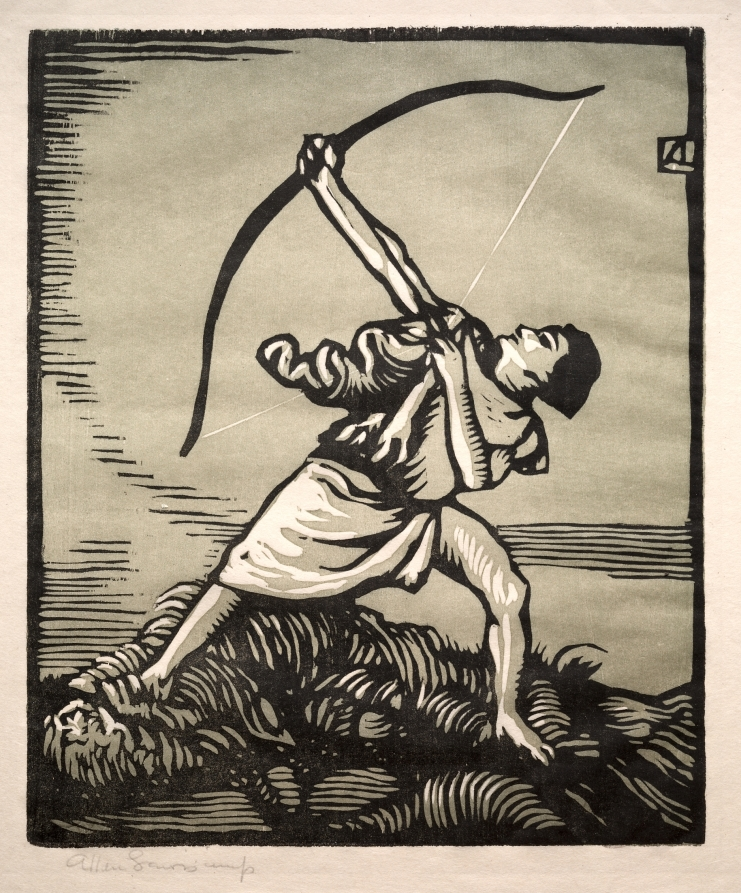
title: Archer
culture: America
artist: Arthur Allen Lewis (American, 1873–1957)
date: c. 1900–1926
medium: chiaroscuro woodcut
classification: Print